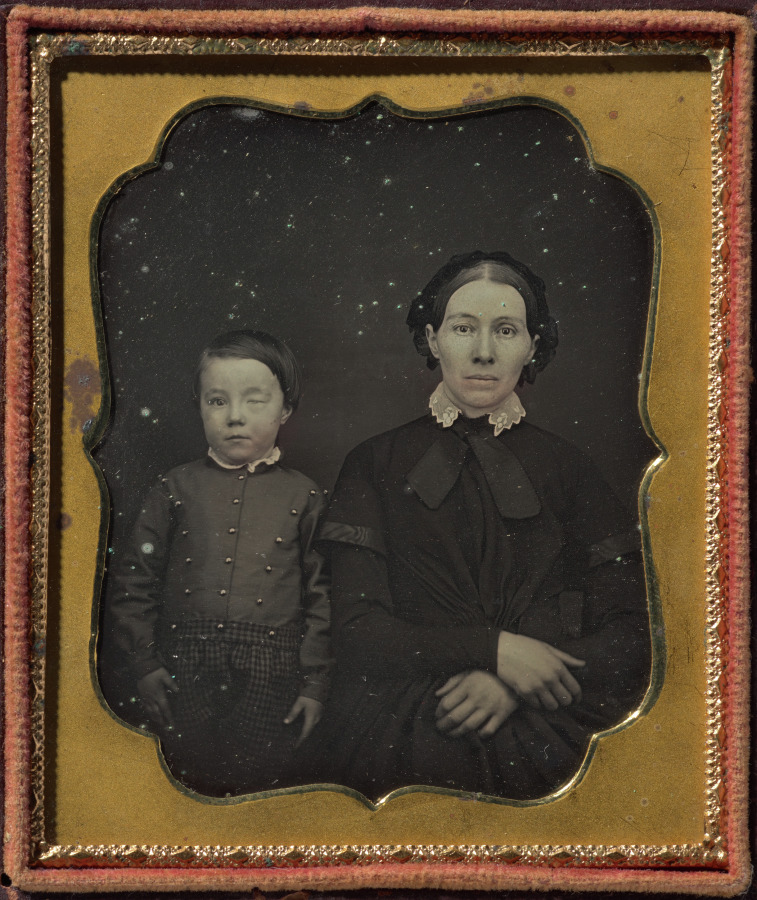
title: Mother with son with blind right eye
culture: America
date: c. 1855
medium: daguerreotype, sixth plate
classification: Photograph